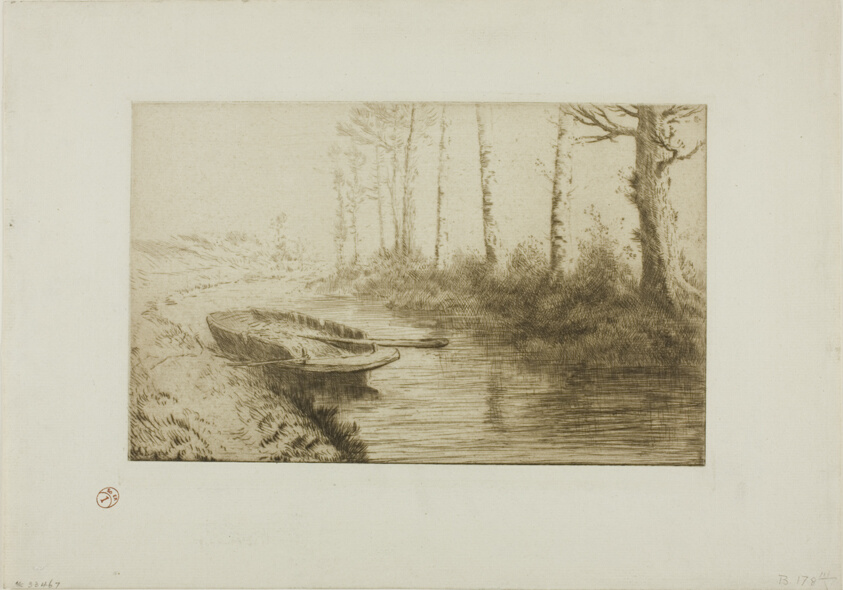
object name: Print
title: The Canal: Morning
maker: Alphonse Legros (French, 1837-1911)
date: c. 1877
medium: Etching and drypoint printed in brown on light green laid paper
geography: France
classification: etching; print; prints and drawing